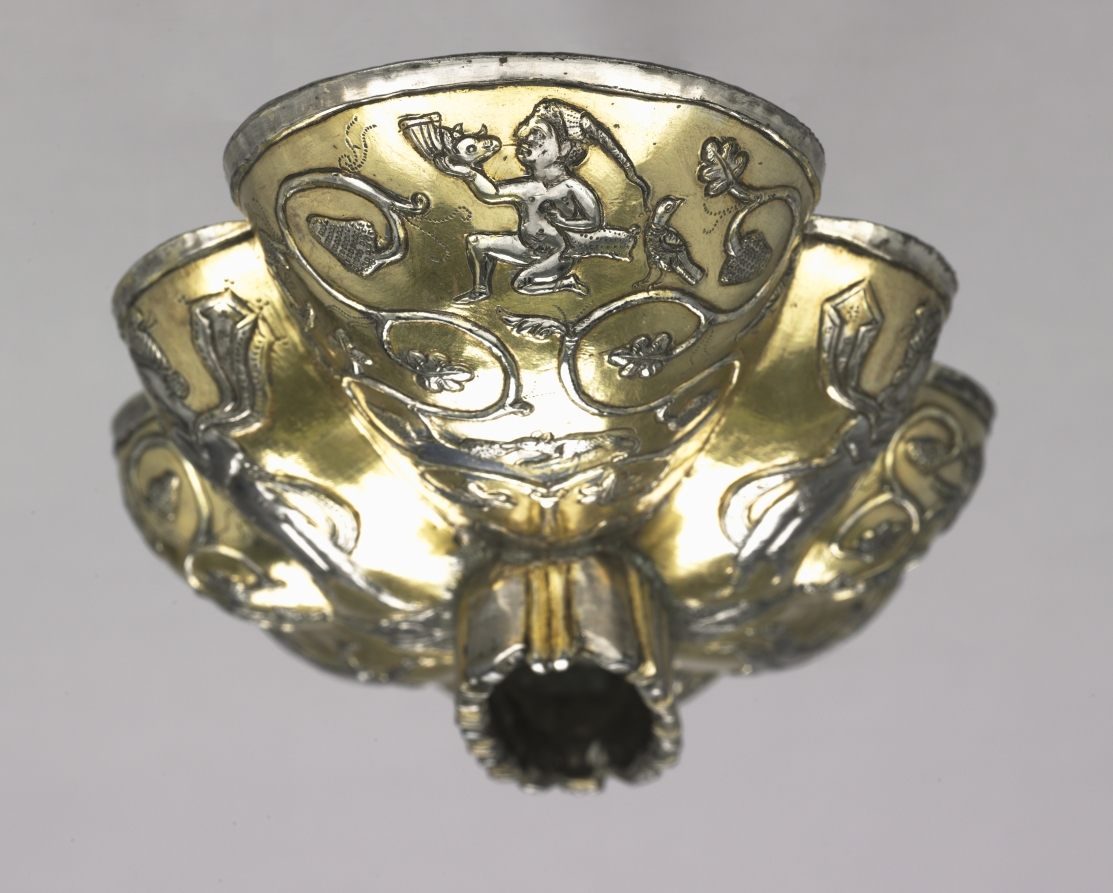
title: Bowl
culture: Iran, Sasanian Empire (224–651 CE)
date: 300–500 CE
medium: silver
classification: Metalwork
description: The decoration on this bowl—a vine with a little nude, accompanied by musicians drinking wine from a rhyton—is related to the Hellenistic cult of Dionysos, or Bacchus, which was brought to Iran by the Greeks and became absorbed into the cult of Anahita.